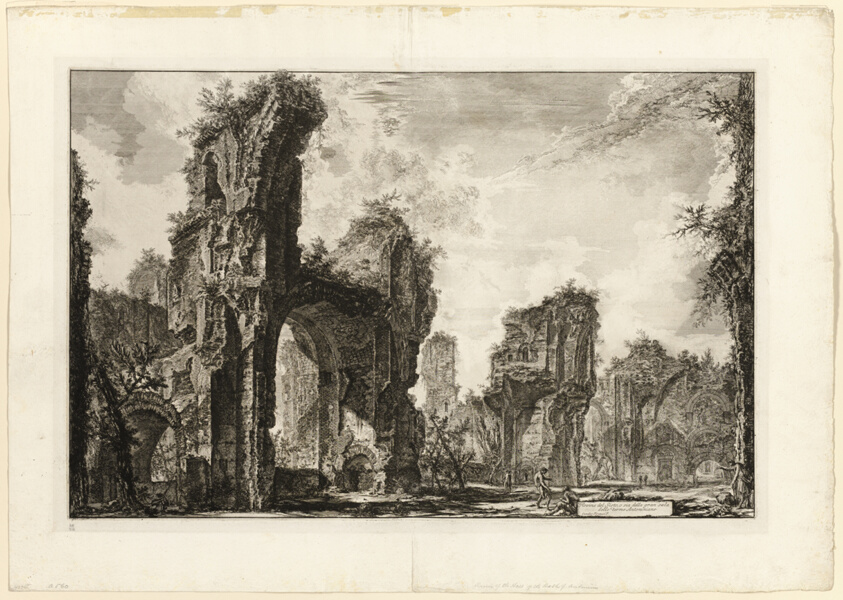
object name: Print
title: Ruins of the Xystus [a long open portico used for athletic exercises], the central hall of the Antonine Baths [The Baths of Caracalla], from Views of Rome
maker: Giovanni Battista Piranesi (Italian, 1720-1778); published by Francesco (Italian, 1758-1810) and Pietro Piranesi (Italian, born 1758/9)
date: 1765, published 1800–07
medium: Etching on heavy ivory laid paper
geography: Italy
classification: etching; print; prints and drawing